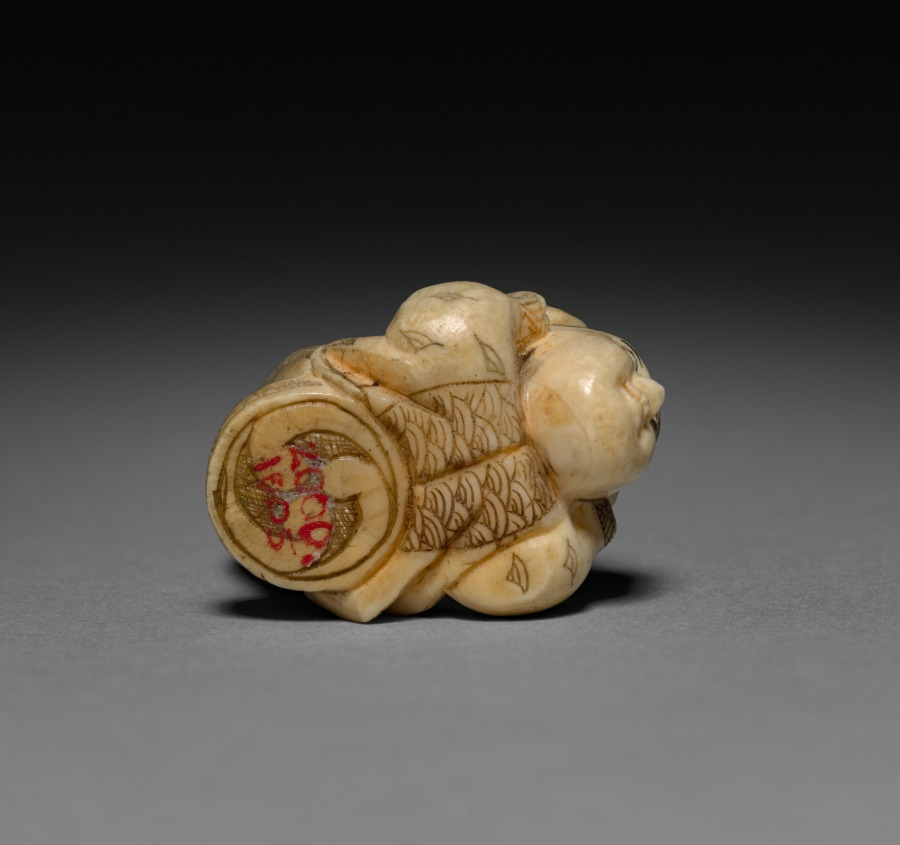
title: Netsuke of Child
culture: Japan, Meiji period (1868–1912)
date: early 1900s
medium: ivory, pigment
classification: Ivory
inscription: 玉心